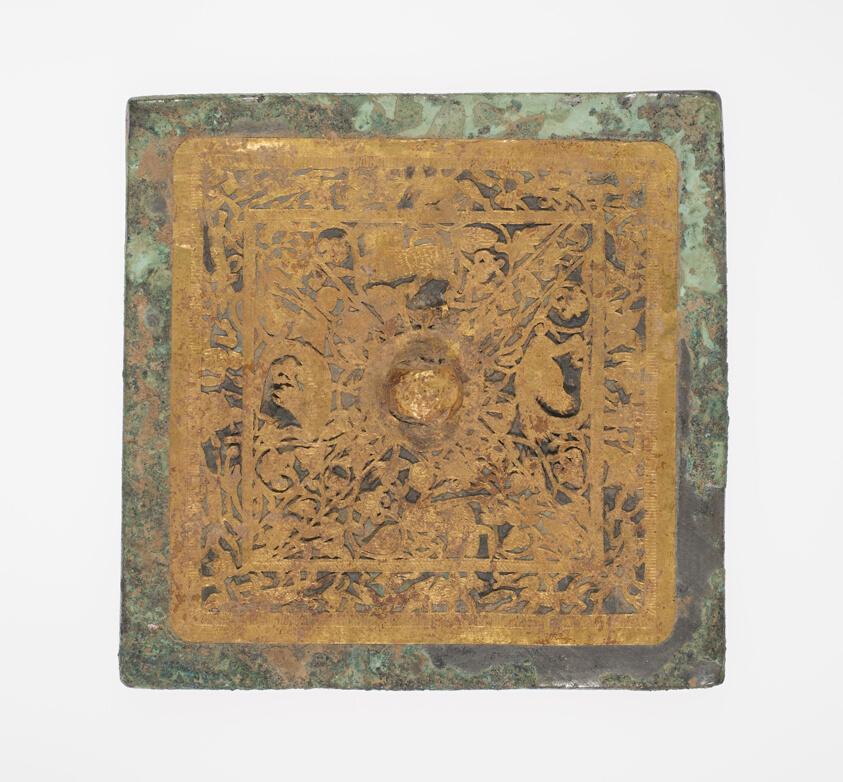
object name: Decorative Arts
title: Mirror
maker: China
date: Tang dynasty (618–907)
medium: Bronze with overlay of cut gold foil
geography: China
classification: bronze; metal; mirror; asian art; decorative arts